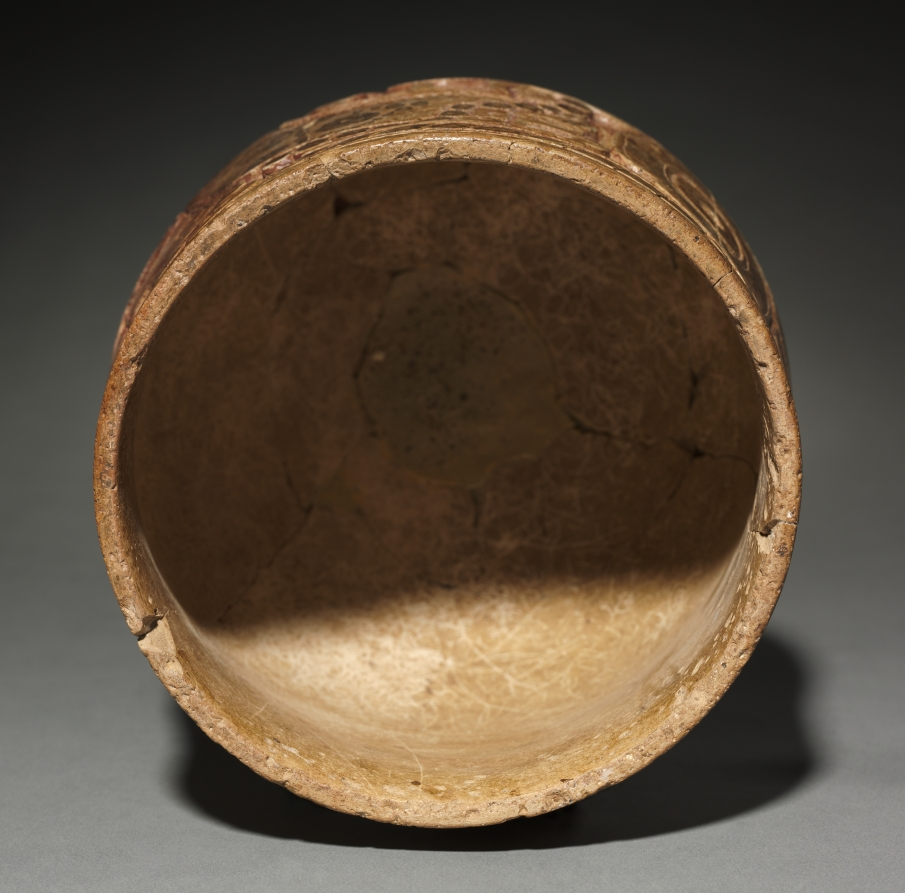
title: Carvel Vessel with an Underworld Diety (God L)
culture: Mexico, Yucatán Peninsula, Maya (Chocholá) style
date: 600–900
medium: earthenware, slip, pigment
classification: Ceramic